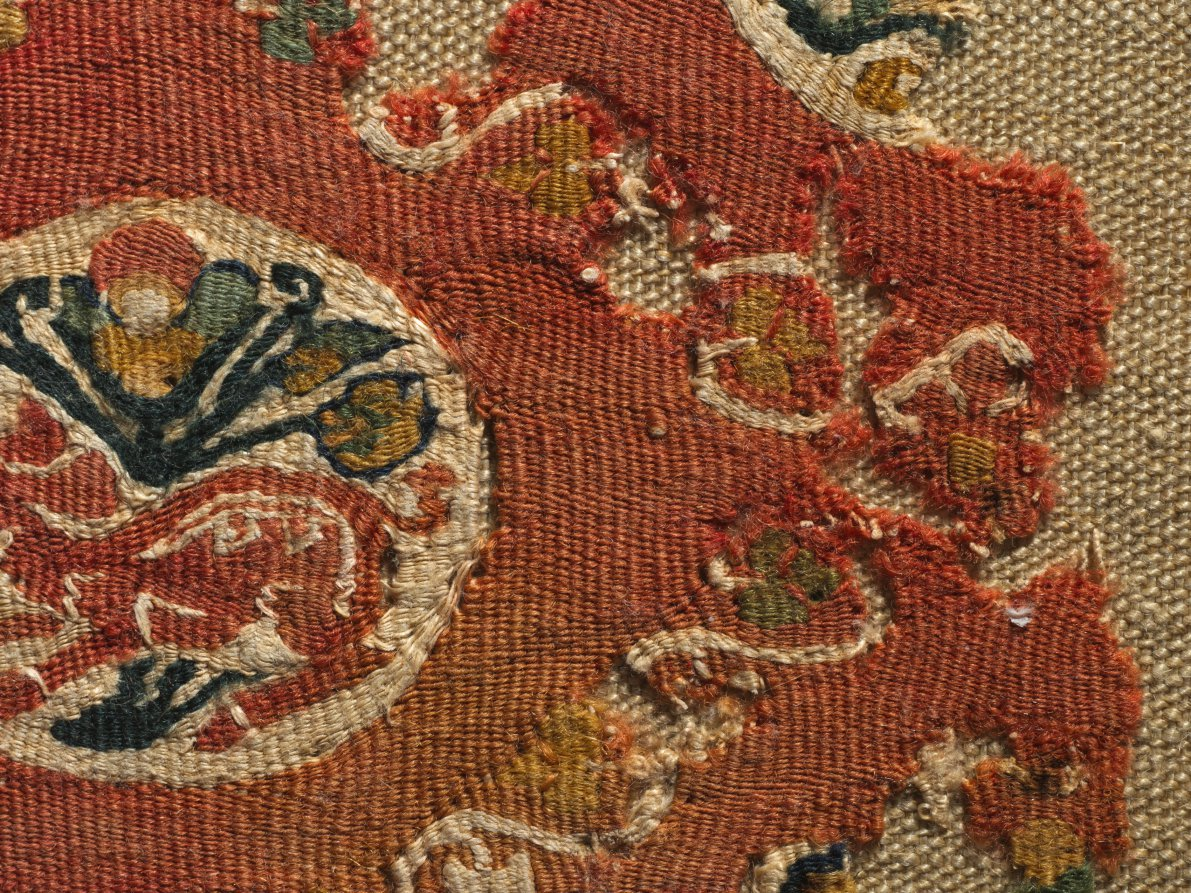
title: Tapestry with lattice of animals in medallions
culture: Egypt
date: 600s–700s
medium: wool and linen: tapestry weave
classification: Tapestry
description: This is a fragment from an horizontal band that was woven to be applied as a decoration to a garment. It has diamond compartments containing floral, geometric, and animal motifs.